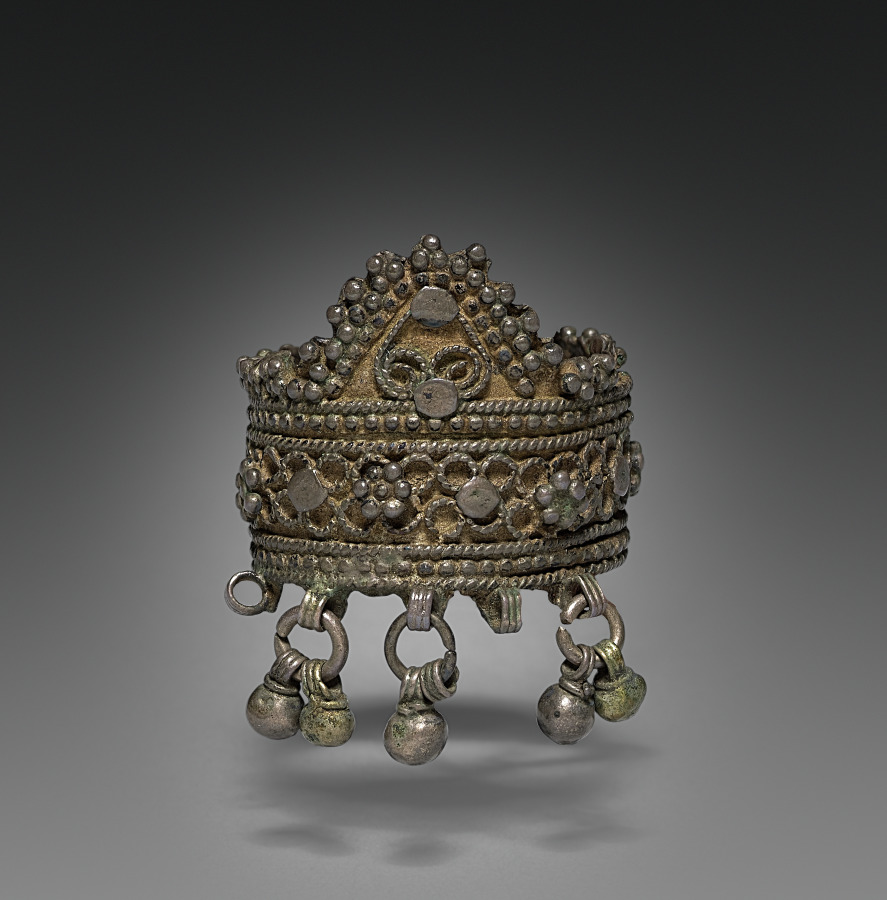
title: Ring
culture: India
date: 1800s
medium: silver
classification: Jewelry